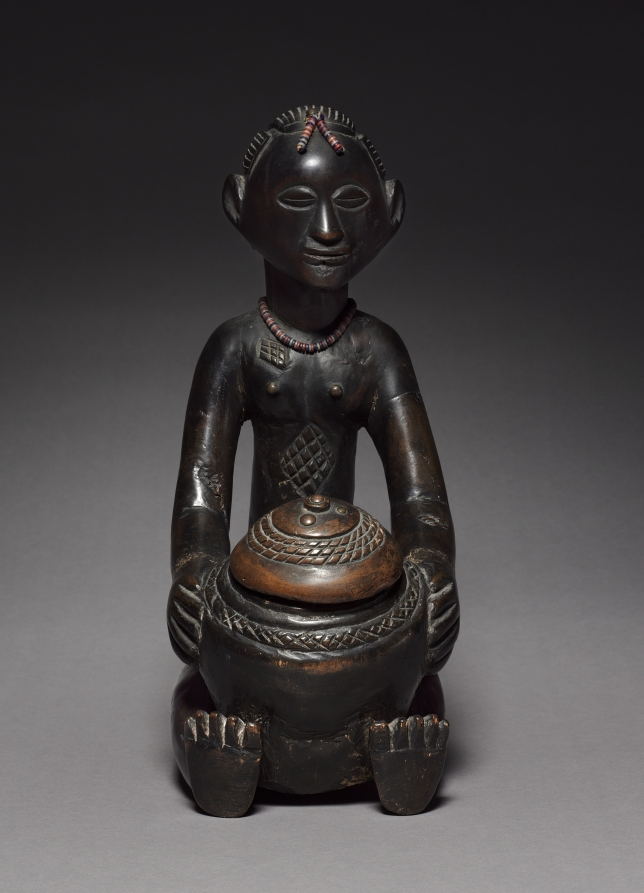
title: Female Bowl-Bearing Figure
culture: Africa, Central Africa, Democratic Republic of Congo, Luba-style carver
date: late 1800s-early 1900s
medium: Wood, glass beads, upholstery studs, plant fiber, and iron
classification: Sculpture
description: In Luba-style art, an object's beauty affects how well it works. While bowl-bearing figures had many possible uses, a royal diviner likely used this well-carved image of a woman carrying a bowl in rituals. Dusty traces of mpemba (white chalk) fleck the shining exterior and the bowl's interior, showing it once held this sacred powder. Diamond-shaped scarification marks at her waist, chest, and back add to her beauty. Her hair is carved into the cascading layered hairstyle worn in the Luba region at the turn of the twentieth century. Strands of imported glass beads encircle her waist and neck, and dangle from her hair. The alternating white and blue beads may symbolize the moon and Mbidi Kiluwe, a culture hero linked to royal practice and smithing. While much Luba-style art depicts women—who are societally important—men created and owned the majority of such works.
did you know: Symbolic of anvils, the round metal tacks decorating the figure's hair "pin" spirits and their secrets within it. They are at the hairline and each of the four hair cascades (the bottommost is now gone).